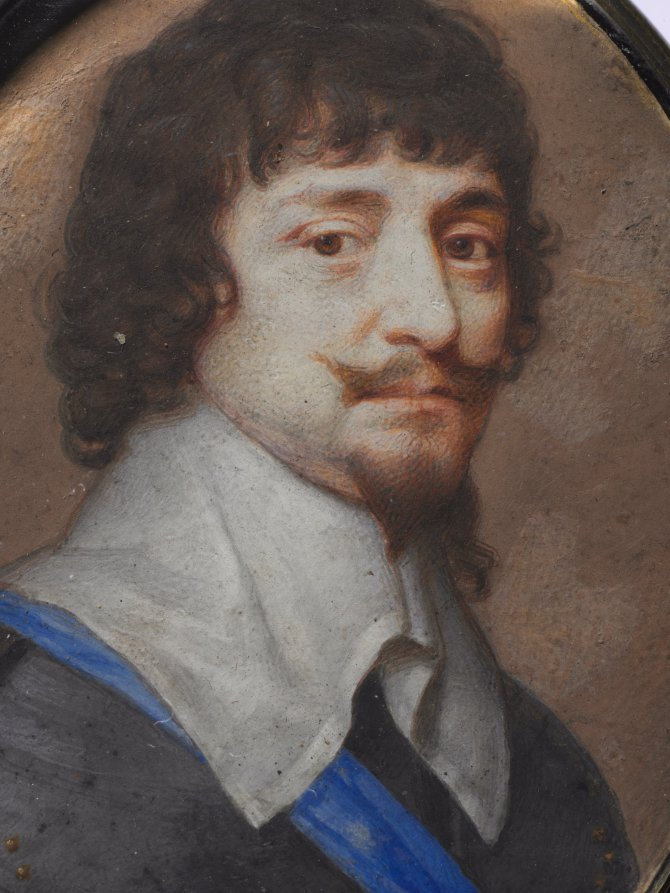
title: Portrait of Frederick V, Elector Palatine, King of Bohemia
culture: England, 17th century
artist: John Hoskins (British, c. 1590–1665)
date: 1630s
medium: watercolor on vellum in a silver gilt frame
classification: Portrait Miniature